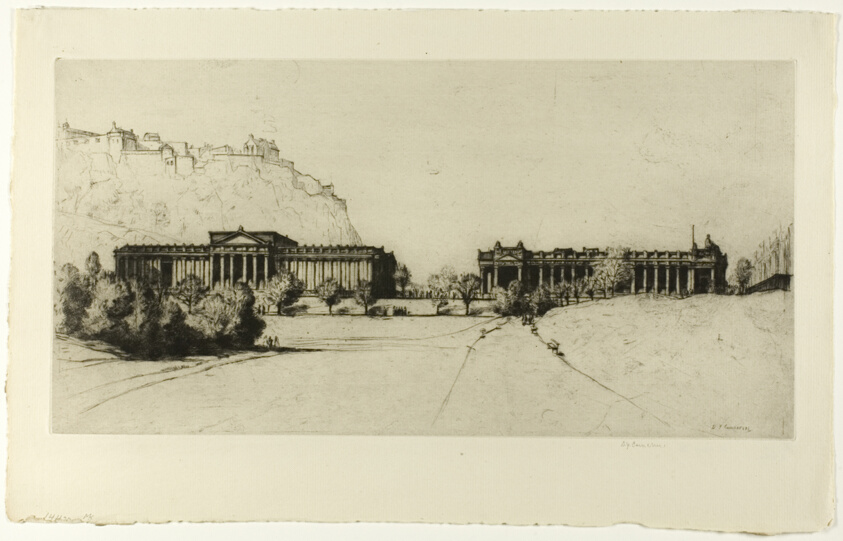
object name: Print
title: The Royal Scottish Academy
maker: David Young Cameron (Scottish, 1865-1945)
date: 1916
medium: Etching and drypoint on cream laid paper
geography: Scotland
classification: etching; print; prints and drawing